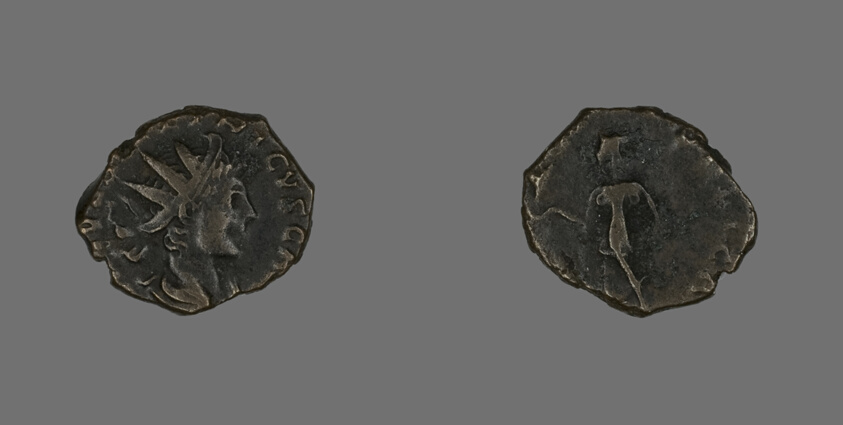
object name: Coin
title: Coin Portraying Emperor Tetricus II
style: roman (ancient, style or period), ancient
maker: Roman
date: 271-274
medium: Silvered bronze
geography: Roman Empire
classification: coin; ancient art